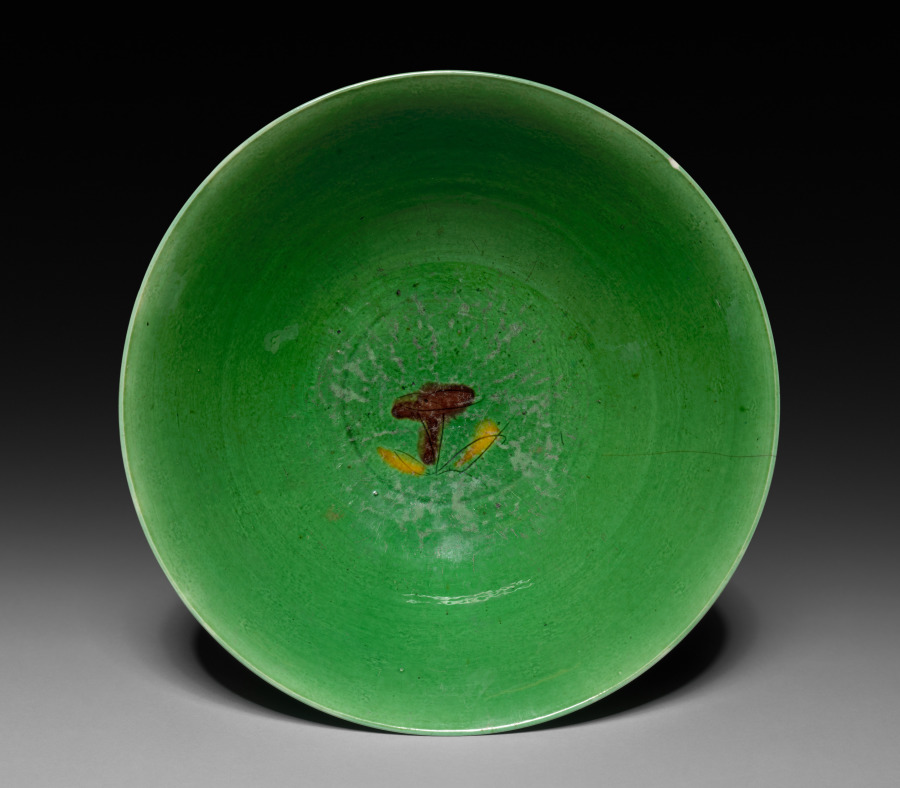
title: Bowl with Sprays of Flowers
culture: China, Jiangxi province, Jingdezhen kilns, Qing dynasty (1644-1911), Kangxi reign (1662-1722)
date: 1662–1722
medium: porcelain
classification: Ceramic